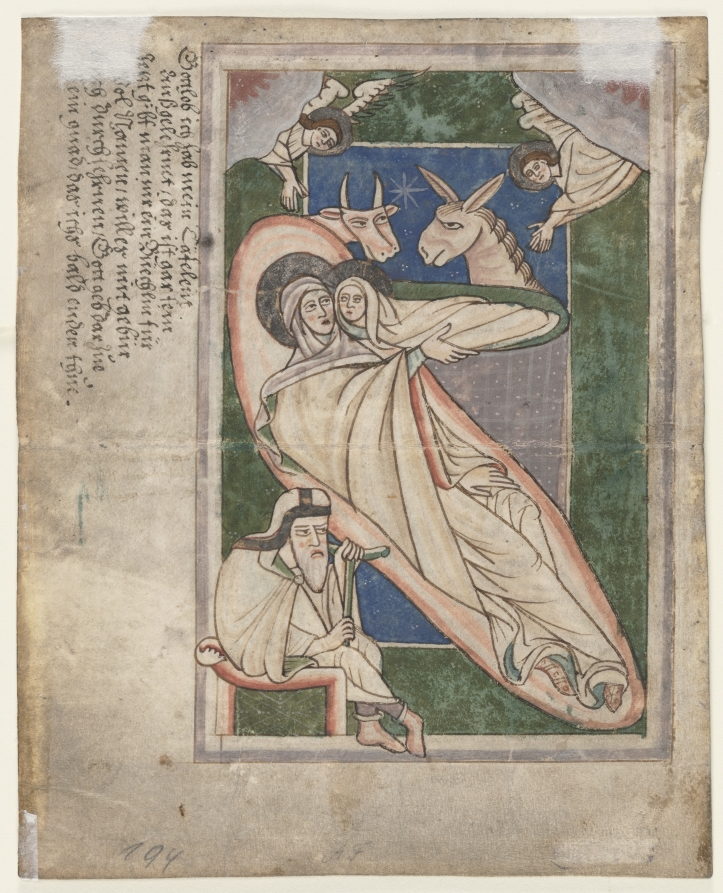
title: Leaf from a Psalter: Nativity (verso)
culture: Germany, Bavaria (possibly Prufening or Augsburg), 13th century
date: early 1200s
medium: ink and tempera on parchment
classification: Manuscript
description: Psalters were commonly used in monasteries and convents during the Middle Ages; the exact origin of this detached psalter leaf, however, is unclear. Stylistically it relates to a small number of manuscripts produced at Prüfening Abbey near Regensburg and to other examples associated with scriptoria at Augsburg from the early 1200s. Though its immediate source remains obscure, it is certainly South German.